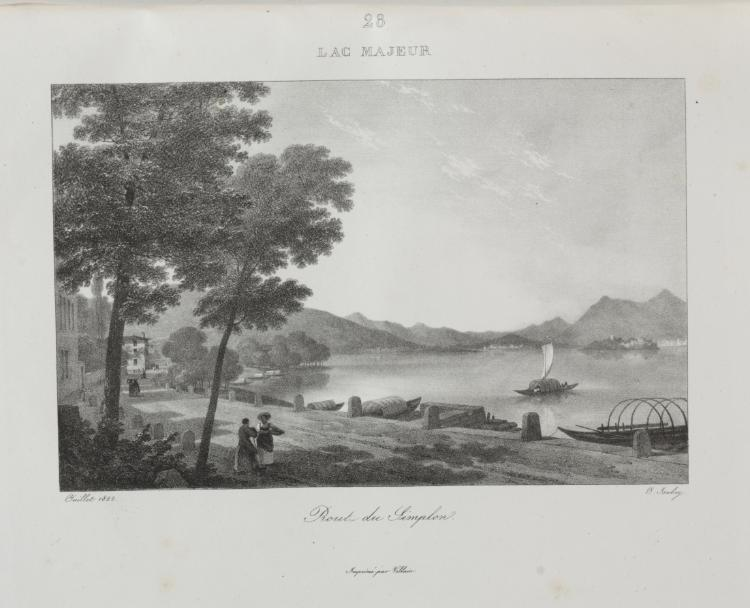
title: Voyage en Italie en 1822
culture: France, 19th century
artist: Jean-Baptiste Isabey (French, 1767–1855)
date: 1833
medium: lithograph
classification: Bound Volume